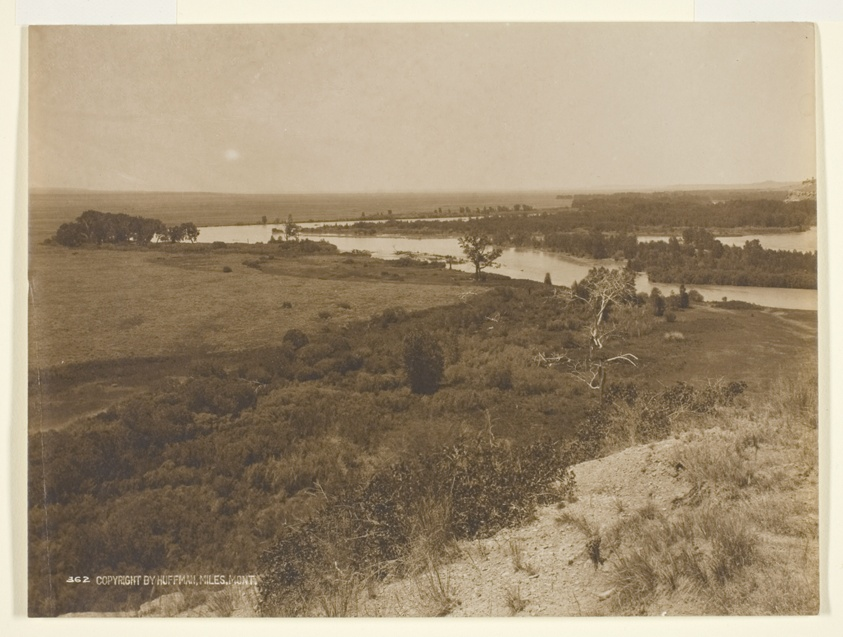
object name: Photograph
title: Yellowstone River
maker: Laton Alton Huffman (American, 1854–1931)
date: c. 1906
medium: Gelatin silver print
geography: United States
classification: gelatin silver (developing-out-paper) pr; photographic process; photography; photograph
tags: landscapes, photography